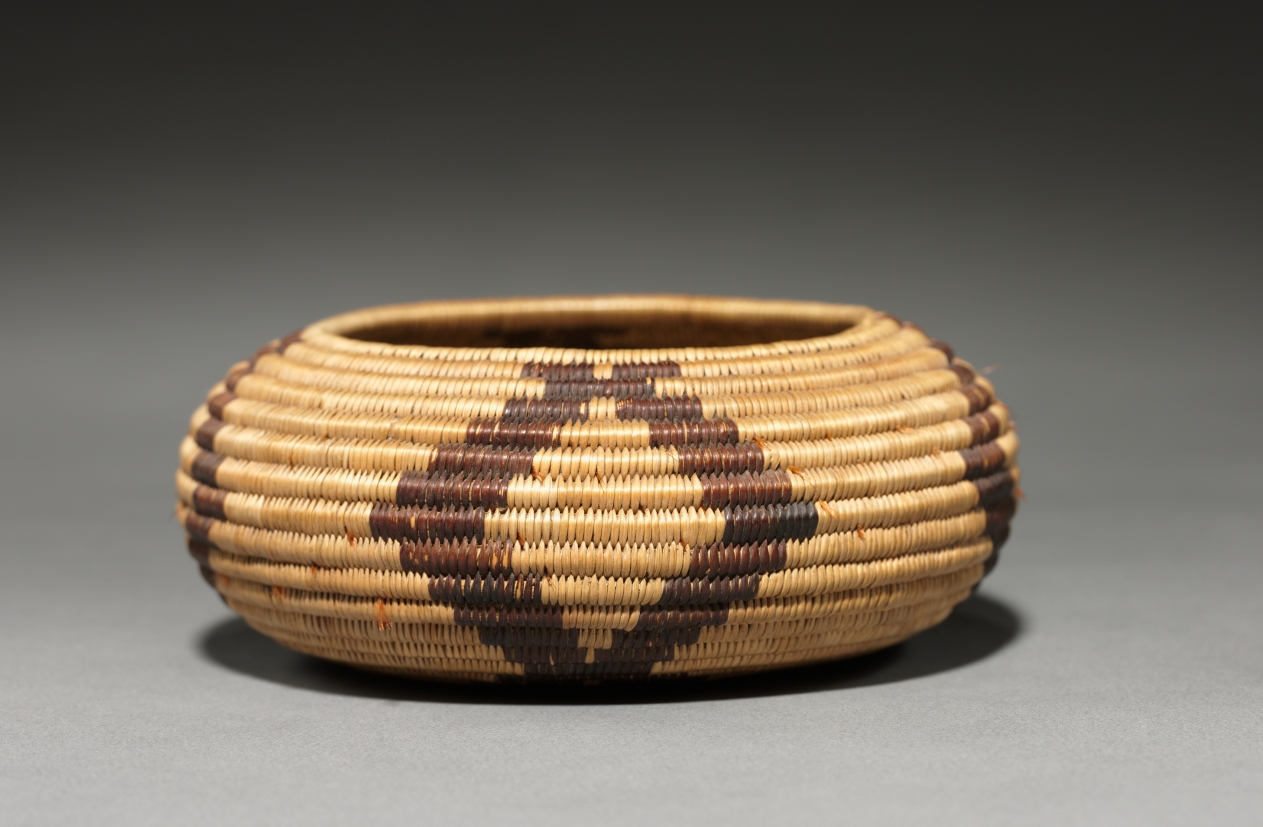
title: Bowl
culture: California, Pomo, Late 19th- Early 20th century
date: 1890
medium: Undyed Bulrush, Sedge; Coiled (3 rods)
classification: Basketry